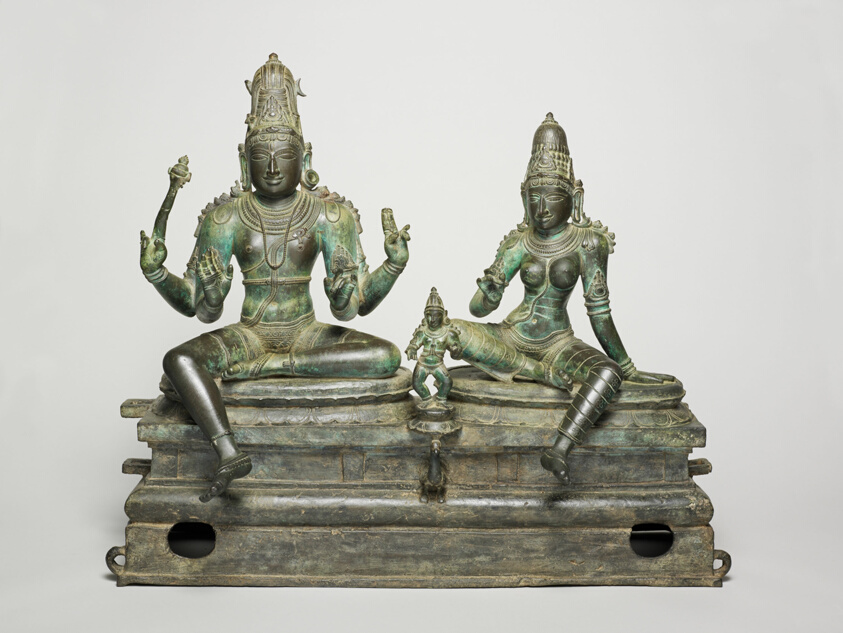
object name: Sculpture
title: God Shiva and Goddess Uma Seated with their Son, Skanda (Somaskanda)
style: South Asian, chola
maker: India; Tamil Nadu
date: Vijayanagar period, about 1400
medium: Bronze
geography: Tamil Nadu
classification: bronze; metal; sculpture; asian art